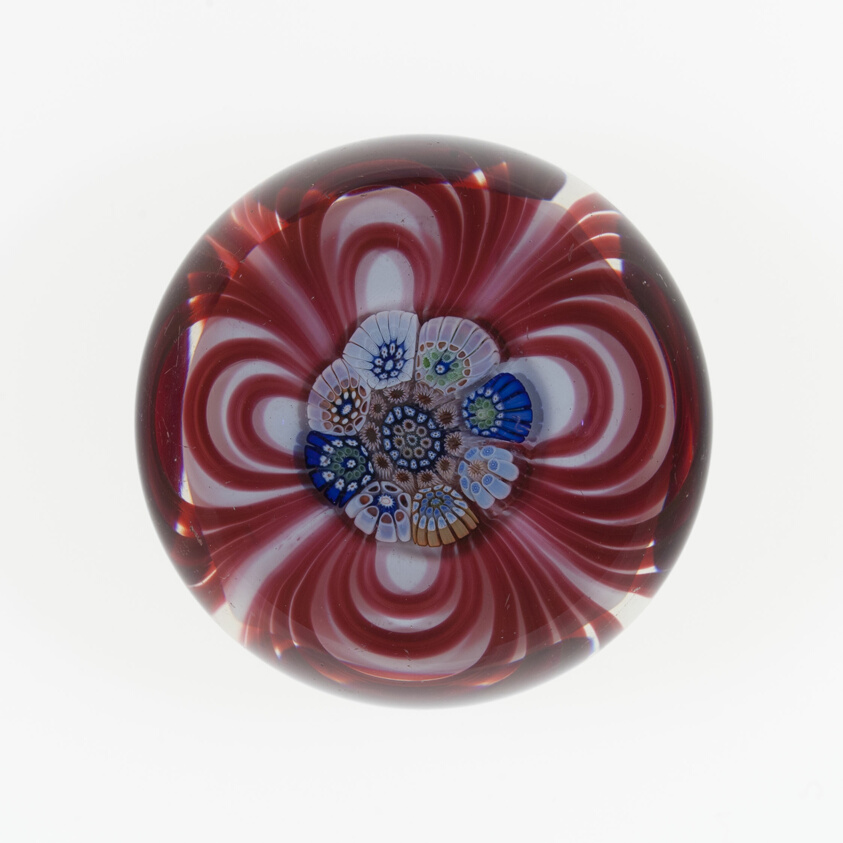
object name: Glass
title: Paperweight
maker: Saint-Louis Glassworks (Cristalleries de Saint-Louis); Lorraine, France, founded 1586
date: c. 1846–55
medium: Glass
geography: Saint-Louis-lès-Bitche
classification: paperweight; lampwork; european decorative arts; glass